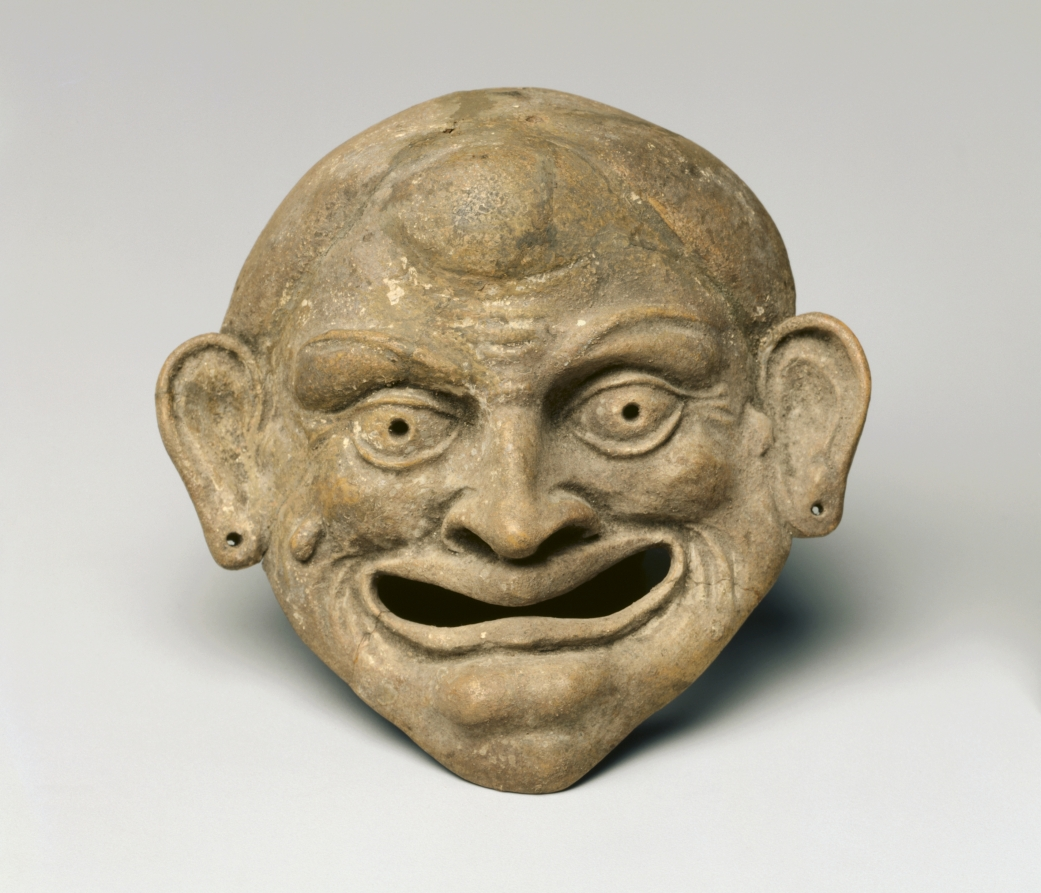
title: Mask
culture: Italy, Roman (?)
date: 1–100 CE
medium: terracotta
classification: Sculpture